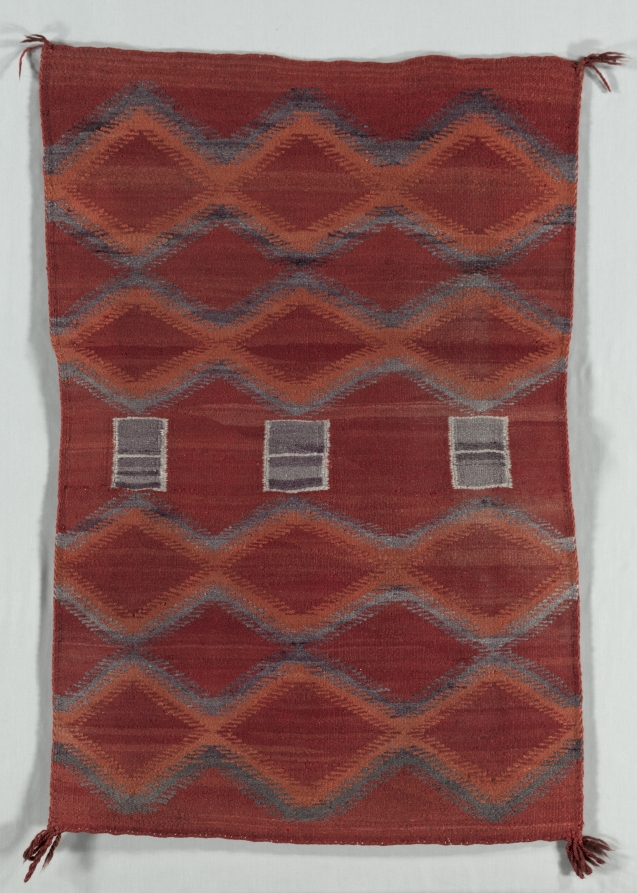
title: Rug or Saddle Blanket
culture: America, Native North American, Southwest, Navajo, Post-Contact, Early Period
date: c. 1890–1910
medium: tapestry weave: cotton and wool (handspun)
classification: Textile